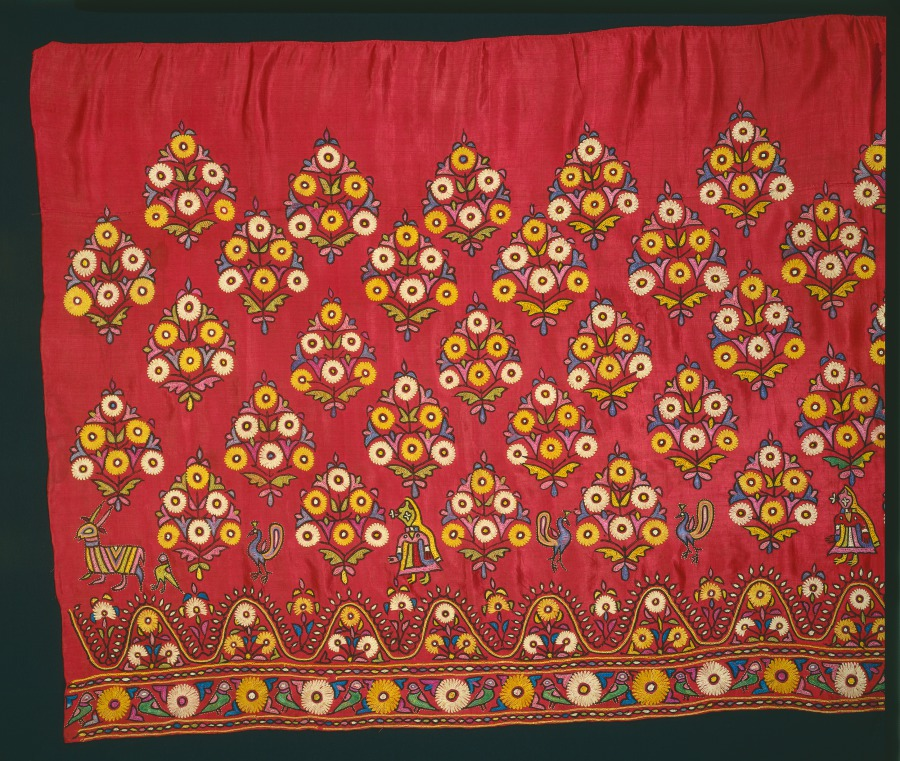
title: Panel for a Skirt (Ghagra)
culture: Western India, Gujarat, Kachchh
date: late 1800s or early 1900s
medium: embroidered satin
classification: Embroidery